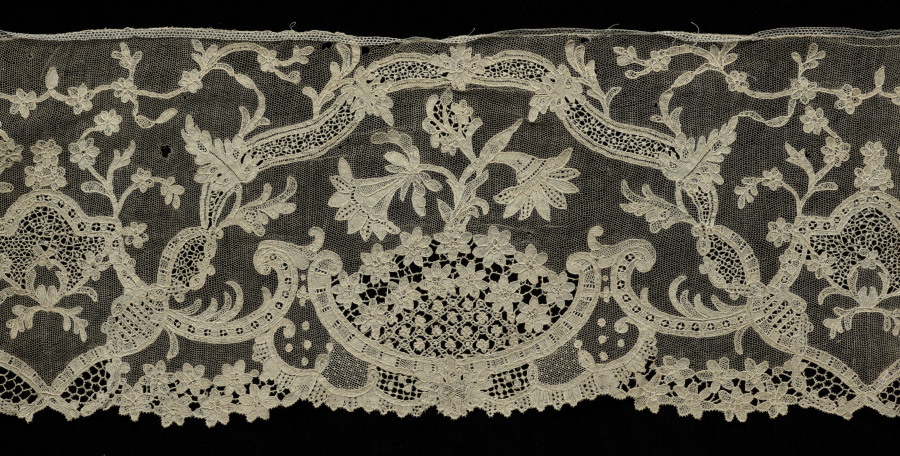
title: Lace Flounce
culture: Italy, Burano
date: 1900–1943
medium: Linen: needle lace (Burano Point)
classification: Lace